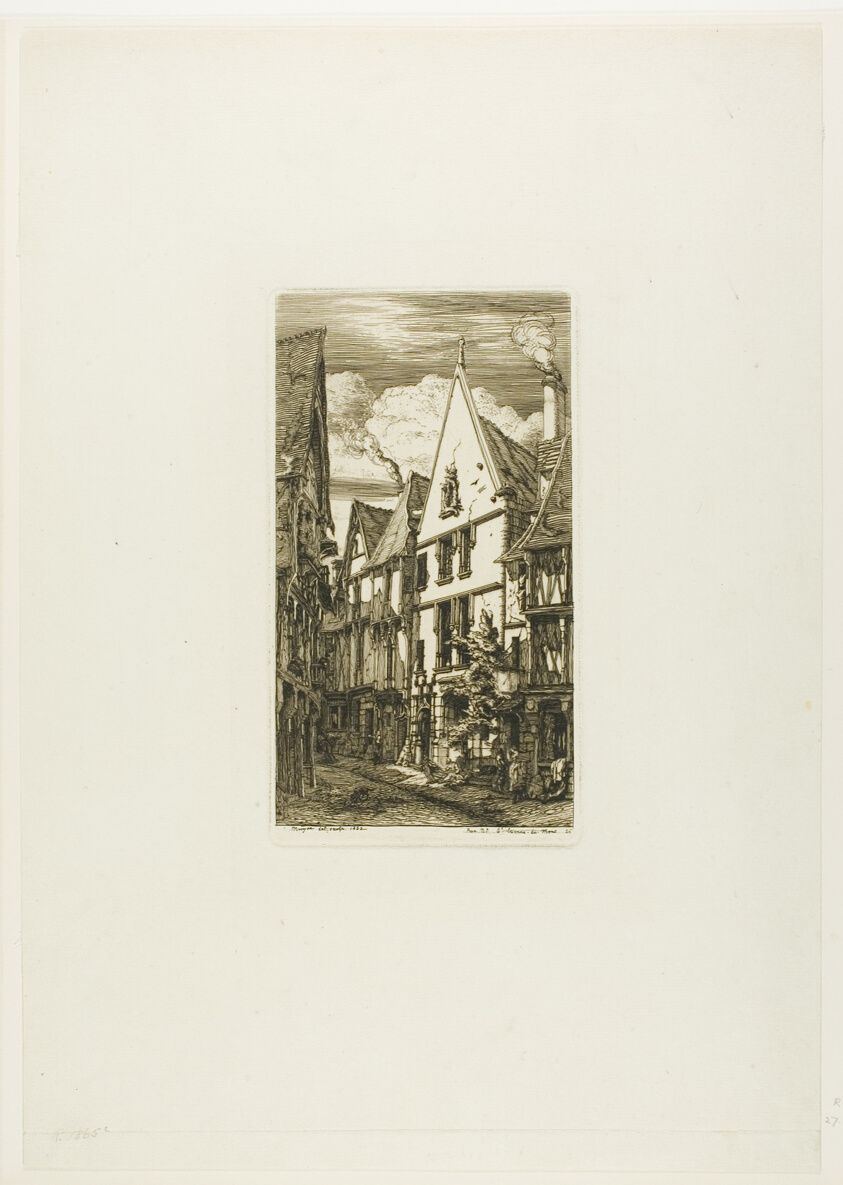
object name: Print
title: Rue des Toiles, Bourges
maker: Charles Meryon (French, 1821-1868)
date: 1853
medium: Etching and drypoint on ivory laid paper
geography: France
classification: etching; print; prints and drawing